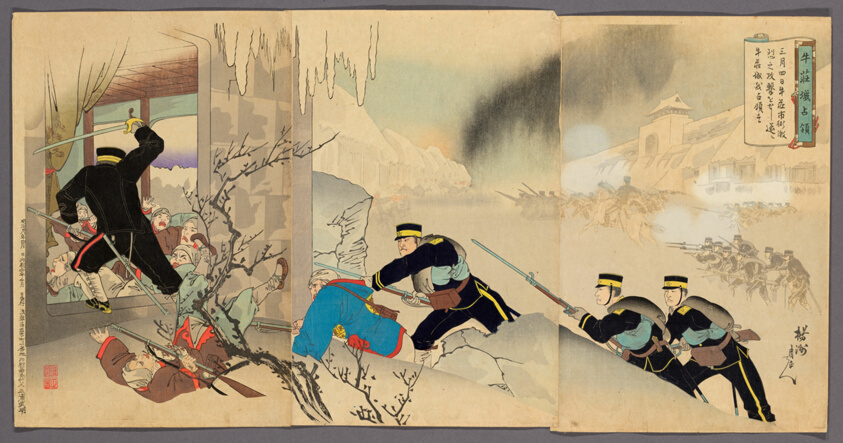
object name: Print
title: Capturing the Fortress at Niuzhuang (Gyusojo senryo)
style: Japanese (culture or style)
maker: Hashimoto (Yoshu) Chikanobu (Japanese, 1838-1912)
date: 1895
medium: Color woodblock print; oban triptych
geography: Japan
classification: woodblock print; print